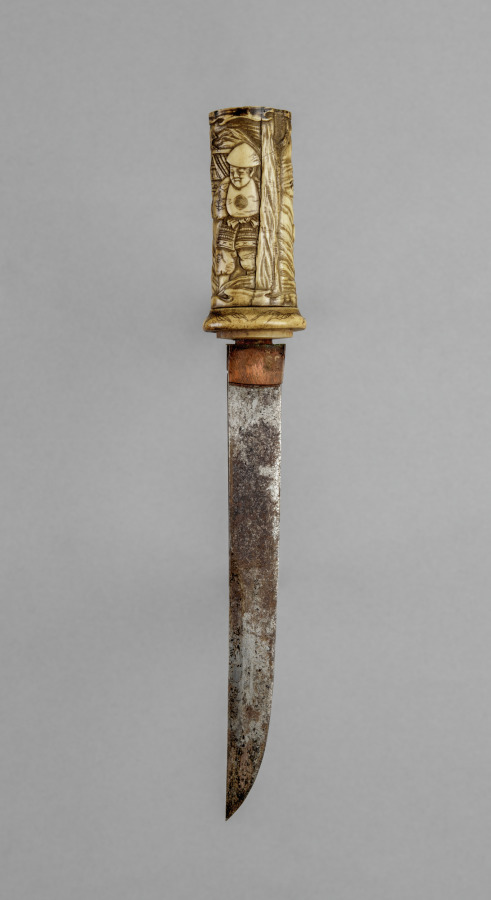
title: Knife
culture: Japan, Edo period (1615–1868)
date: late 1700s- early 1800s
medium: ivory, steel or iron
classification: Arms and Armor